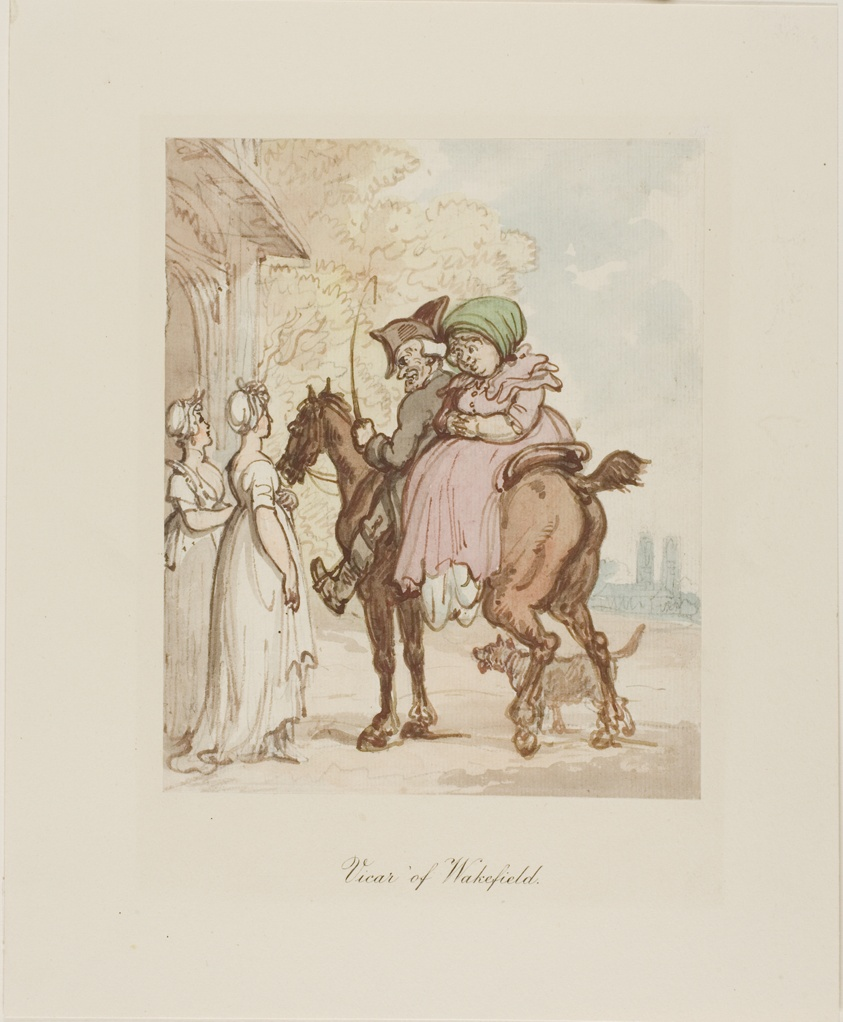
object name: Drawing and Watercolor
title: Vicar of Wakefield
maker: Thomas Rowlandson (English, 1756-1827)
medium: Brush and brown ink and watercolor, over graphite, on ivory laid paper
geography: England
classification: watercolor; drawings (visual works); prints and drawing